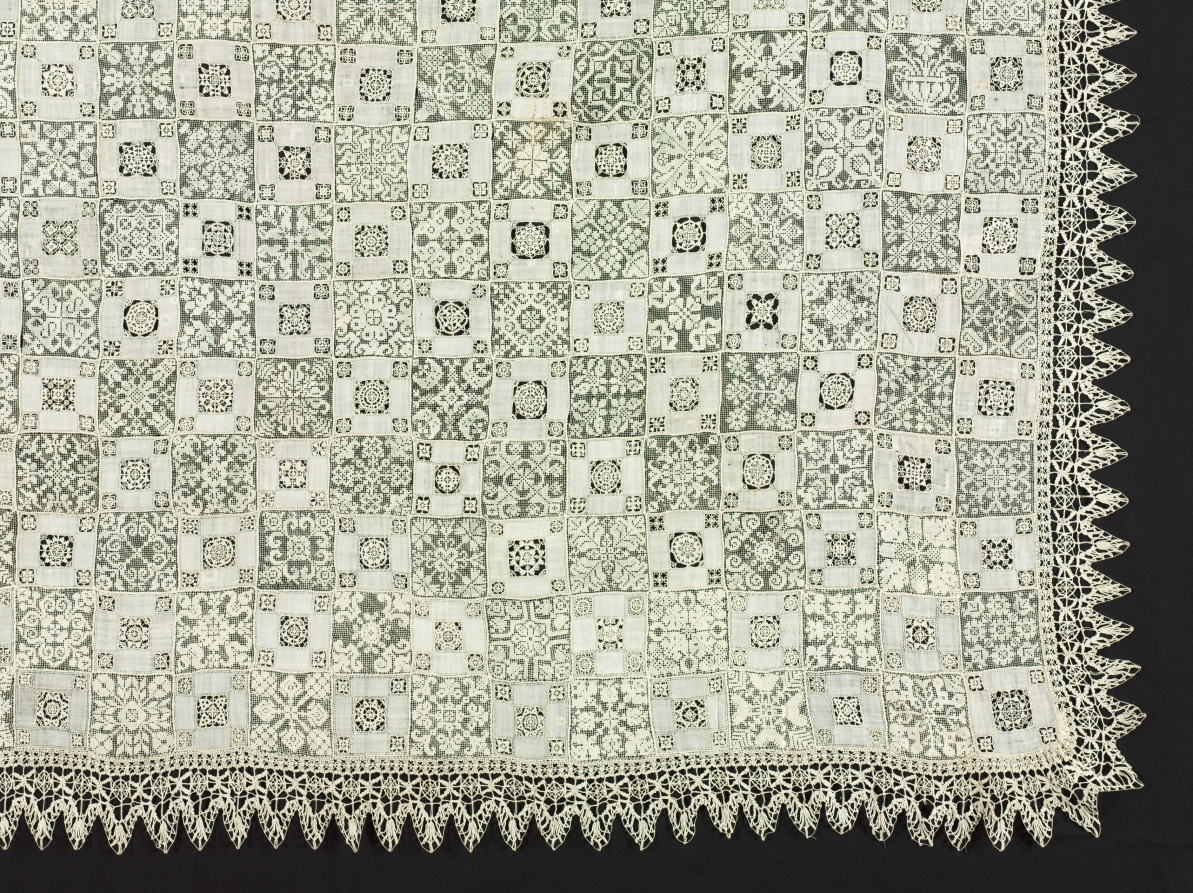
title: Cloth with Floral and Vegetal Patterns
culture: Italy, late 1500s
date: 1560–1600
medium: Bleached linen (est.): needle lace, filet/lacis (knotted ground and darned in two directions), alternating reticella squares (open cutwork), and bobbin lace edging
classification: Lace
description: Textiles often incorporate multiple needlework techniques within a single piece. One of the main techniques in this example of lace is called cutwork. In cutwork, portions of the textile ground, such as a linen or cotton cloth, are cut away and threads are removed to create holes. The edges of the hole are then reinforced with embroidery and a pattern of needle lace can be created within the perimeter. Rather than adding to the cloth to create a design, the craftsperson removes threads to fabricate a pattern.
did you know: The large size and square shape suggest that this textile would likely have been used as a table cloth.